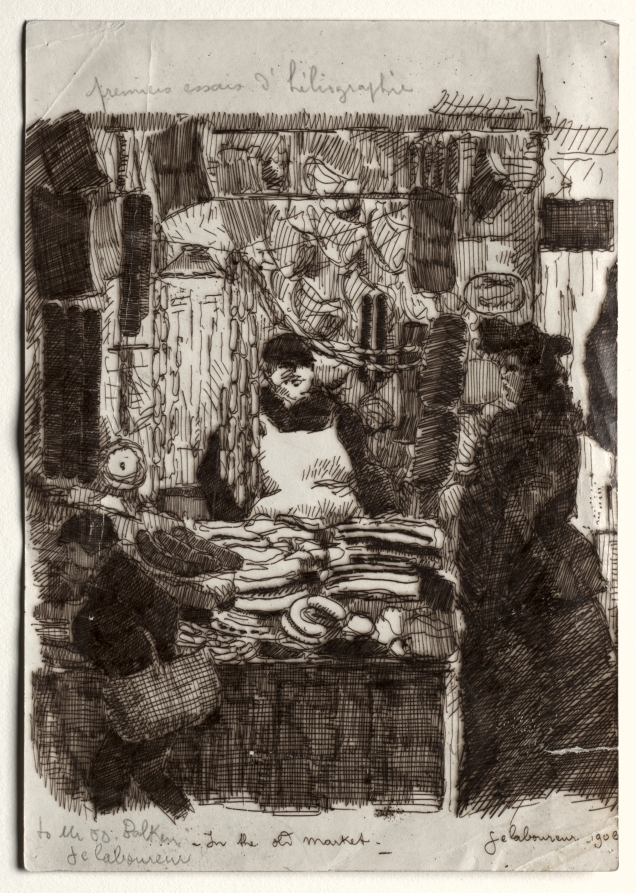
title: In the Old Market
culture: France, 20th century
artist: Jean-Émile Laboureur (French, 1877–1943)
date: 1906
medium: cliché-verre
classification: Print